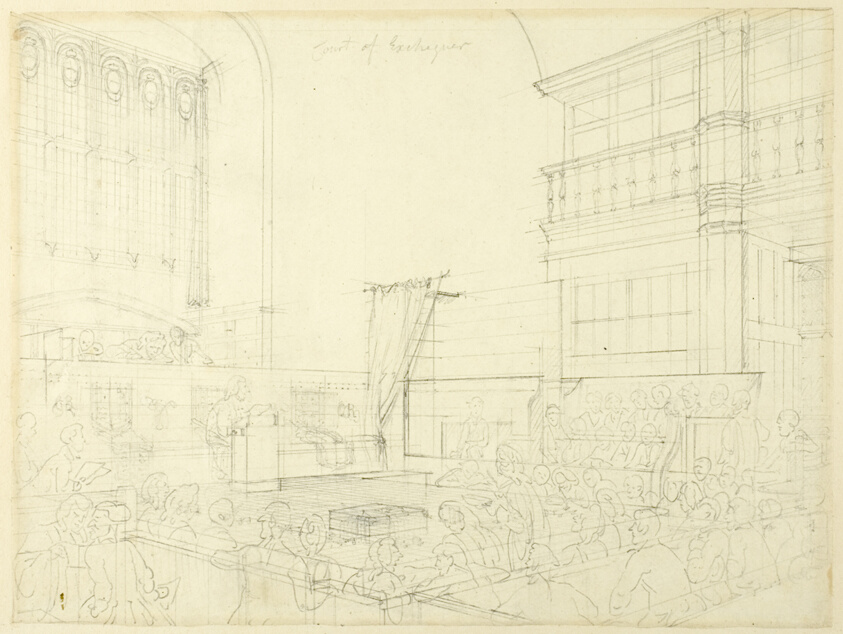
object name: Drawing and Watercolor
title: Study for Court of Exchequer, from Microcosm of London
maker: Augustus Charles Pugin (English, born France, 1762-1832); Thomas Rowlandson (English, 1756-1827)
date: c. 1808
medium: Graphite on ivory wove paper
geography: England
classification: graphite; drawings (visual works); prints and drawing